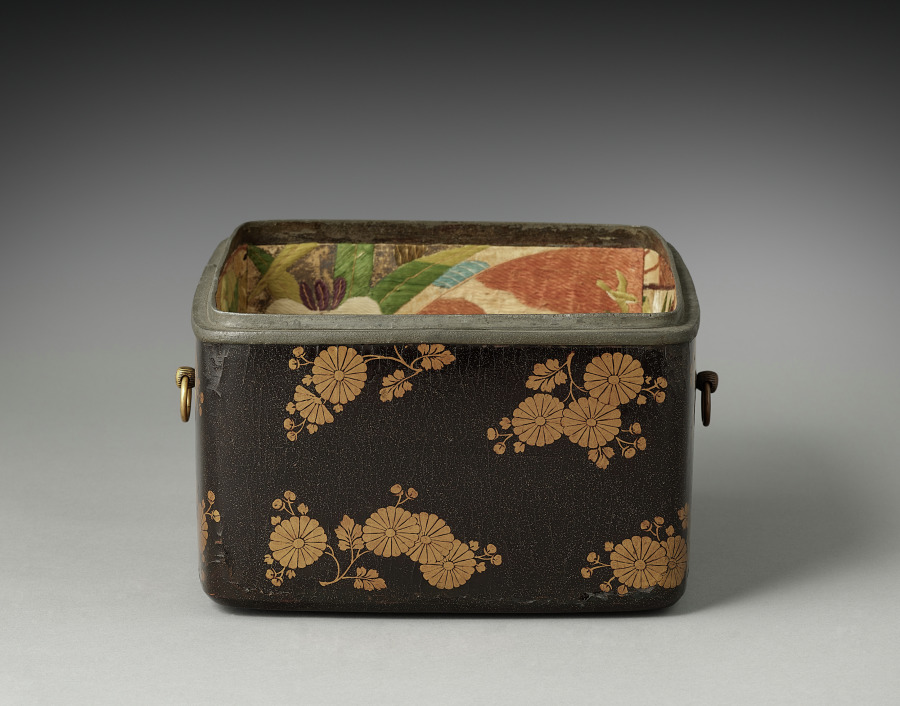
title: Cosmetics Box with Chrysanthemums (base)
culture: Japan, Kamakura period (1185–1333)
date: early 1300s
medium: lacquer on wood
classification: Lacquer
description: In China, the chrysanthemum was historically appreciated for its association with the Double Nine Festival and the reclusive life of the poet Tao Yuanming (AD 365-427). In Japan, the 16-petaled chrysanthemum came to symbolize the Japanese imperial family after Emperor Gotoba (1180-1239) chose the motif as his personal emblem, having it applied to his sword and everyday utensils. This box proves that the flower also appeared on lacquer wares as early as the Kamakura period.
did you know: In Japanese, this type of small box is called a tebako, literally a hand box, and was typically part of a cosmetics set.